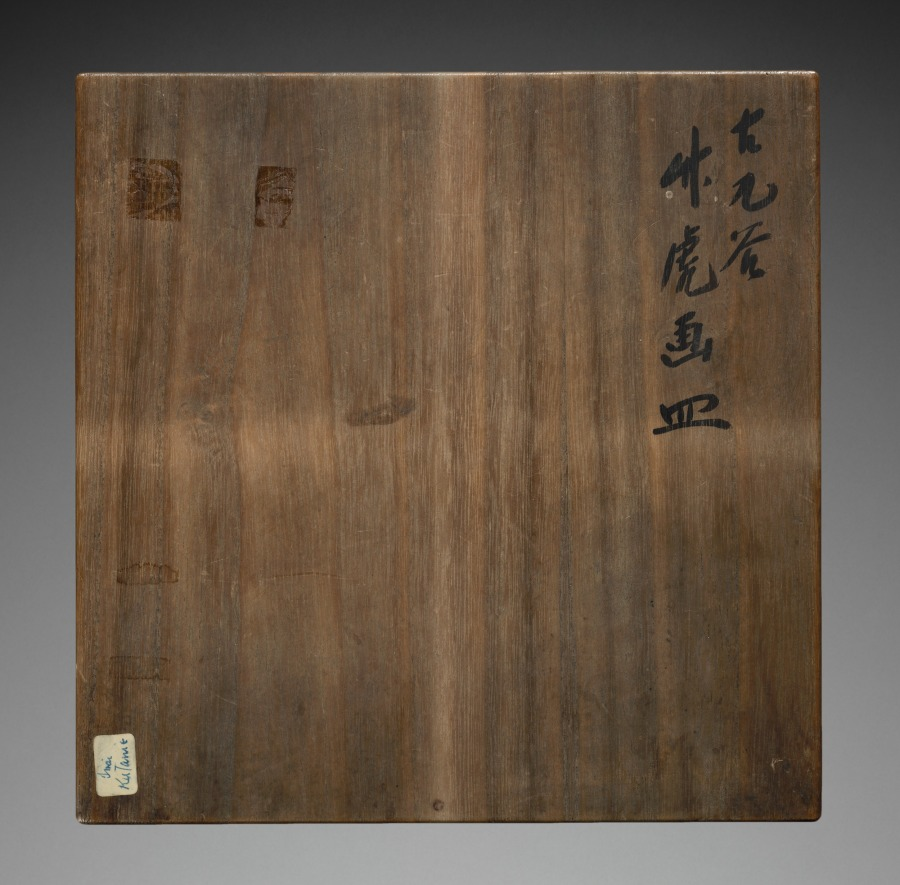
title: Plate with Fan Designs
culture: Japan, Edo period (1615–1868)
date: late 1600s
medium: porcelain with overglaze enamel decoration (Hizen ware, Ko-Kutani type)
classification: Ceramic